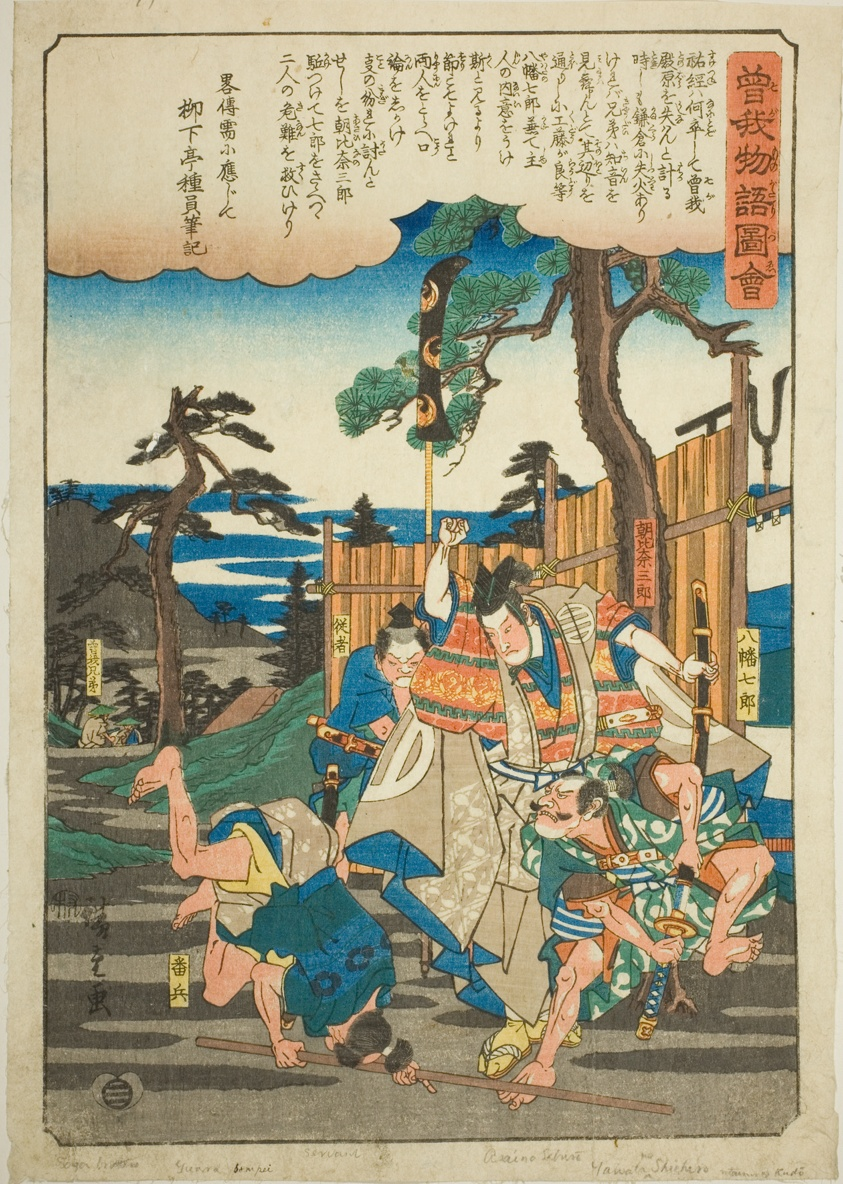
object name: Print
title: Asahina Saburo saves the Soga brothers from Hachiman Shichiro, from the series "Illustrated Tale of the Soga Brothers (Soga monogatari zue)"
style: Japanese (culture or style)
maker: Utagawa Hiroshige 歌川 広重; Japanese, 1797-1858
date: c. 1843/47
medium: Color woodblock print; oban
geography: Japan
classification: woodblock print; print; asian art